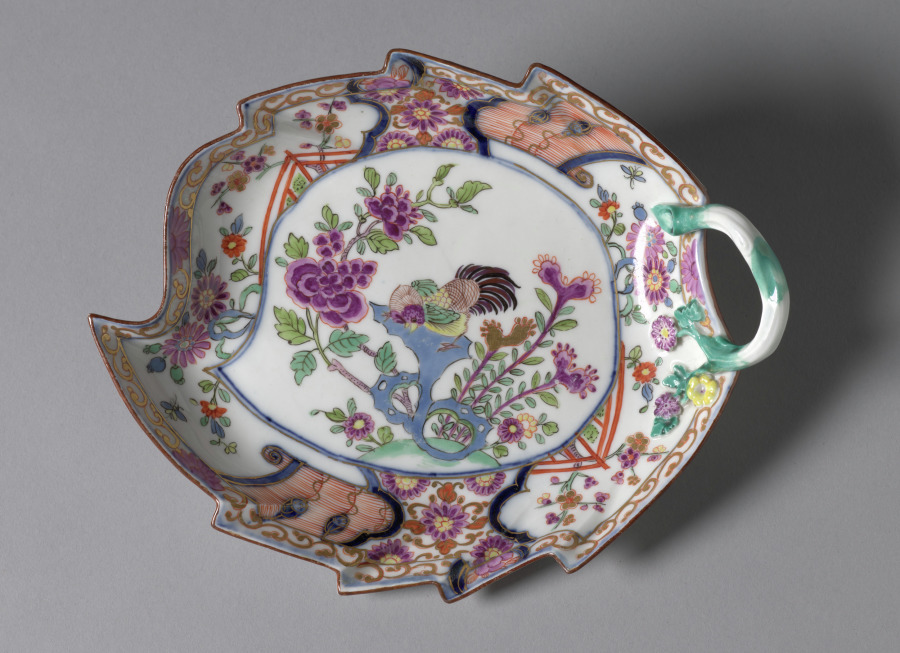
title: Leaf Dish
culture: Germany, Meissen, 18th century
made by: Meissen Porcelain Factory (German, est. c. 1710)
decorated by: possibly by Johann David Kretschmar (German)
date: c. 1735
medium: porcelain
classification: Ceramic